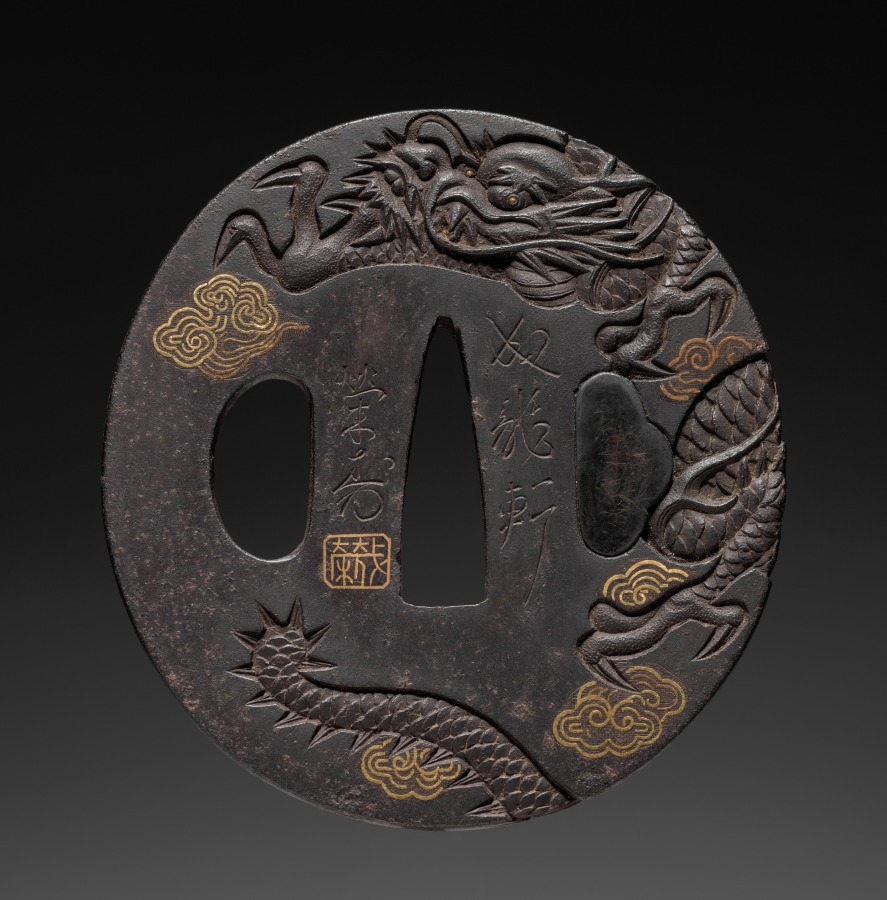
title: Sword Guard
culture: Japan, Edo period (1615–1868)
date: early 1800s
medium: iron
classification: Arms and Armor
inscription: Signature: Seiryuken Hisanaga (or Eiju, and seal) Sei-si.